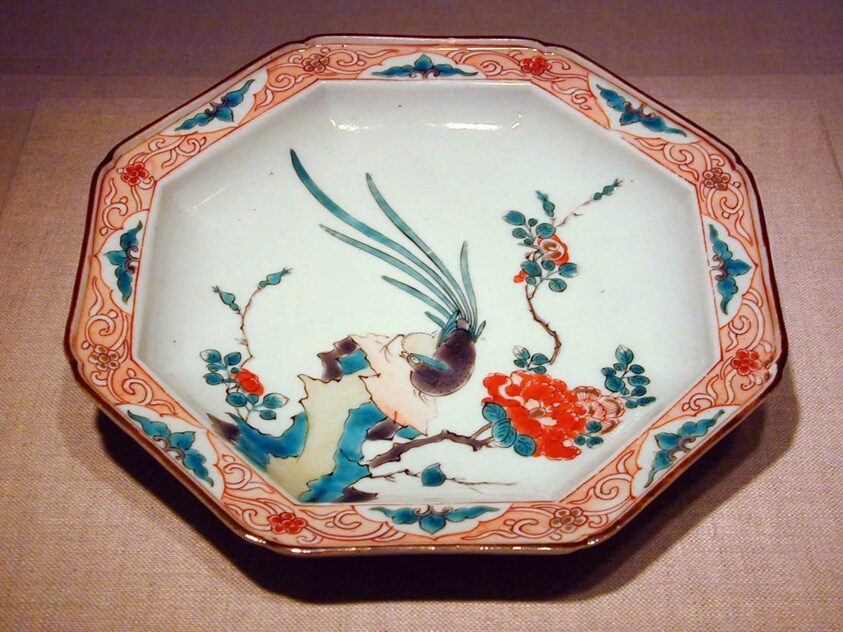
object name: Vessel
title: Arita-ware Kakiemon Octagonal Dish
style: Japanese (culture or style)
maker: Japan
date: 19th–early 20th century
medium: Porcelain with enamel decoration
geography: Japan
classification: dish (vessel); porcelain; asian art; ceramics; vessel